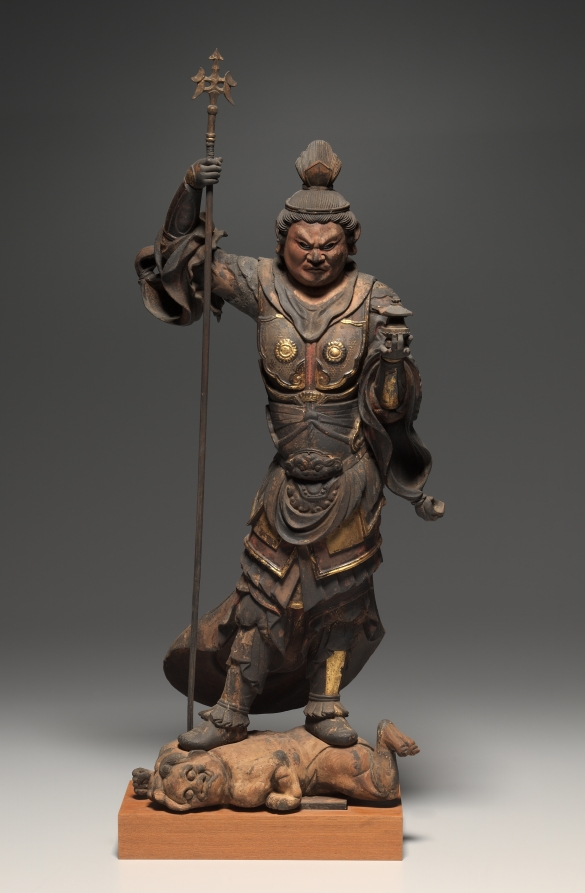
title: Guardian King of the North (Bishamonten)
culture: Japan, Kamakura period (1185–1333)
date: 1185–1333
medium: wood with gold polychromy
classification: Sculpture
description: In Buddhism, Bishamonten is one of four kings who protect the cardinal directions. He stands with a stupa symbolizing the Buddhist teachings and relics of the Buddha in the palm of his left hand, and a spear to foil the enemies of Buddhism in his right. He crushes a demon beneath his feet.